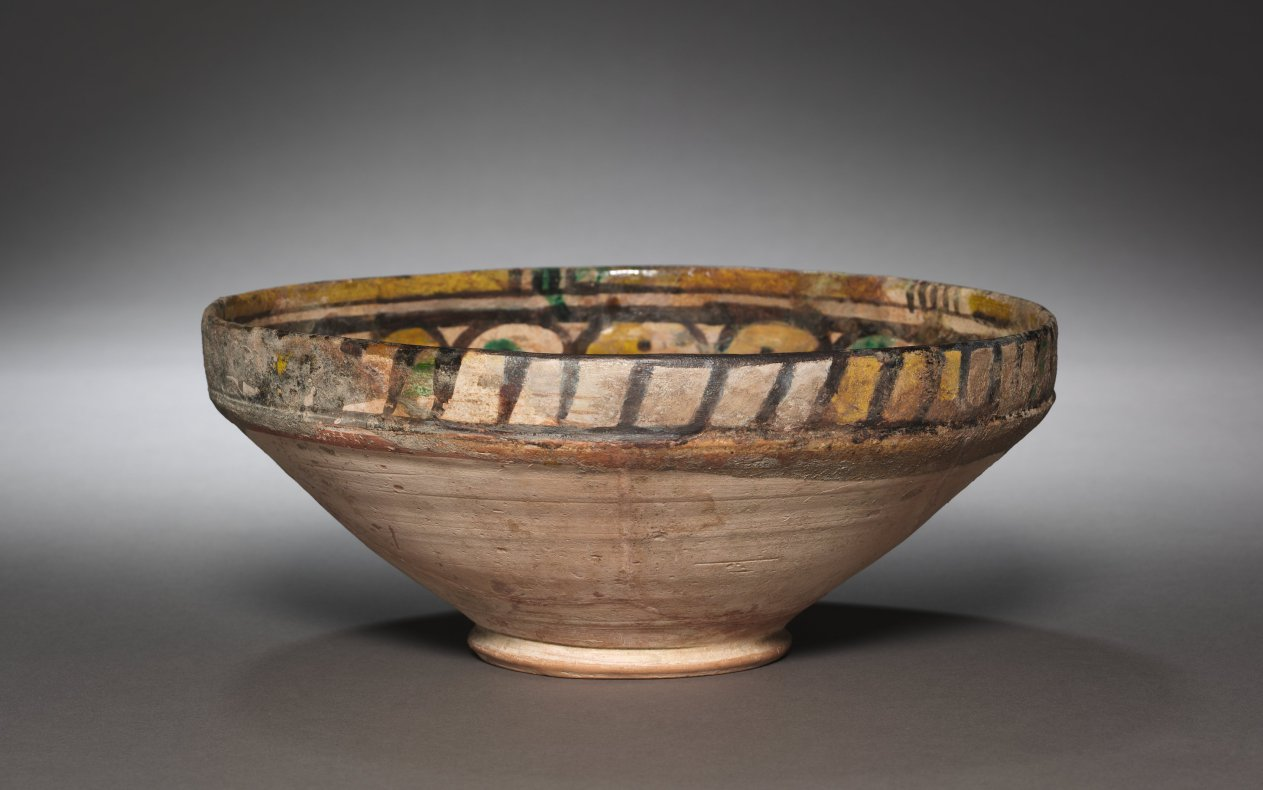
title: Bowl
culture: Iran, Nishapur, Samanid Period, 10th Century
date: 900s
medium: earthenware with underglaze slip-painted decoration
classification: Ceramic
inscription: Two horizontal ornamental motifs at center may be derived from Arabic baraka (blessing), written retrograde.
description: The red earthenware body of this bowl is covered with buff slip, excluding the foot ring. A stylized bird, ornamental motifs, and border designs were done in purplish-brown, red, green, and yellow under a colorless clear glaze.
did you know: The spiral marks on the bowl's exterior and the symmetry indicate that it was shaped by throwing clay on a wheel.